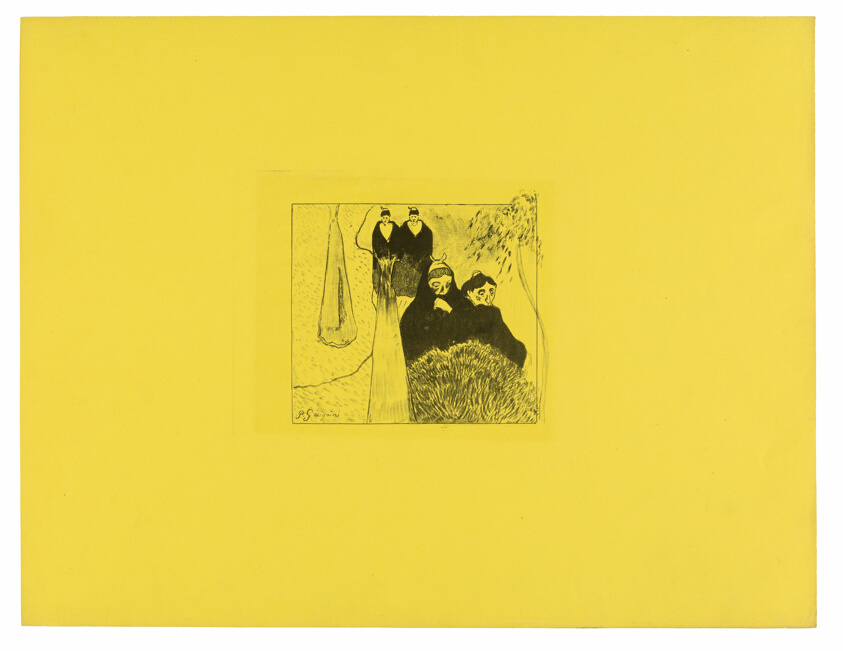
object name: Print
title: Old Women of Arles, from the Volpini Suite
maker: Paul Gauguin (French, 1848-1903)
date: 1889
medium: Zincograph in black on chrome yellow wove paper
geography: France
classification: zincograph; lithograph; print; prints and drawing